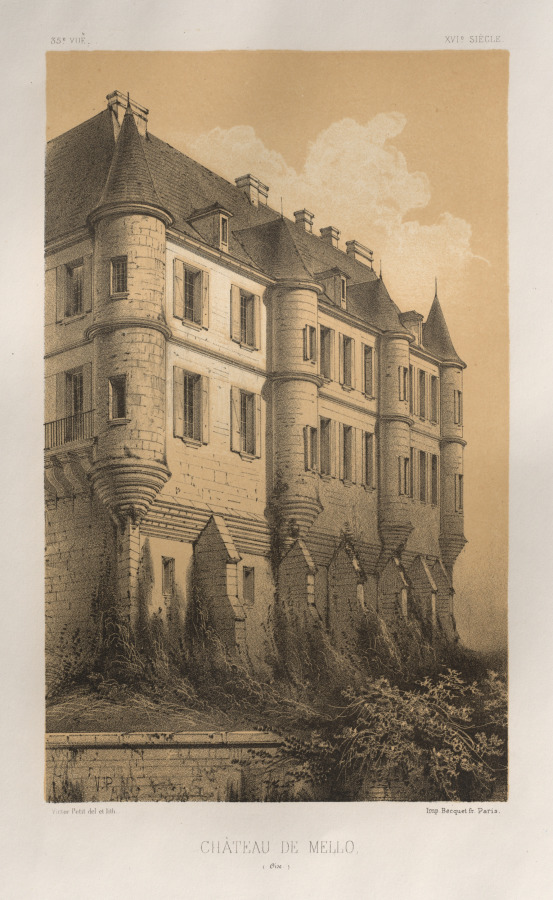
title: Architecture Pittoresque ou Monuments des xveme. Et xvieme. Siecles: Chateaux De France des XV et XVI Siecles: Pl. 35, Château De Mello (Oise)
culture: France, 19th century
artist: Victor Petit (French, 1817–1874)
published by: Charles Boivin (publisher and editor); Lith de Godard a Paris (printer)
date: 1860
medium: lithograph with tint stone, from portfolio of 100 lithographs with tint stone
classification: Print